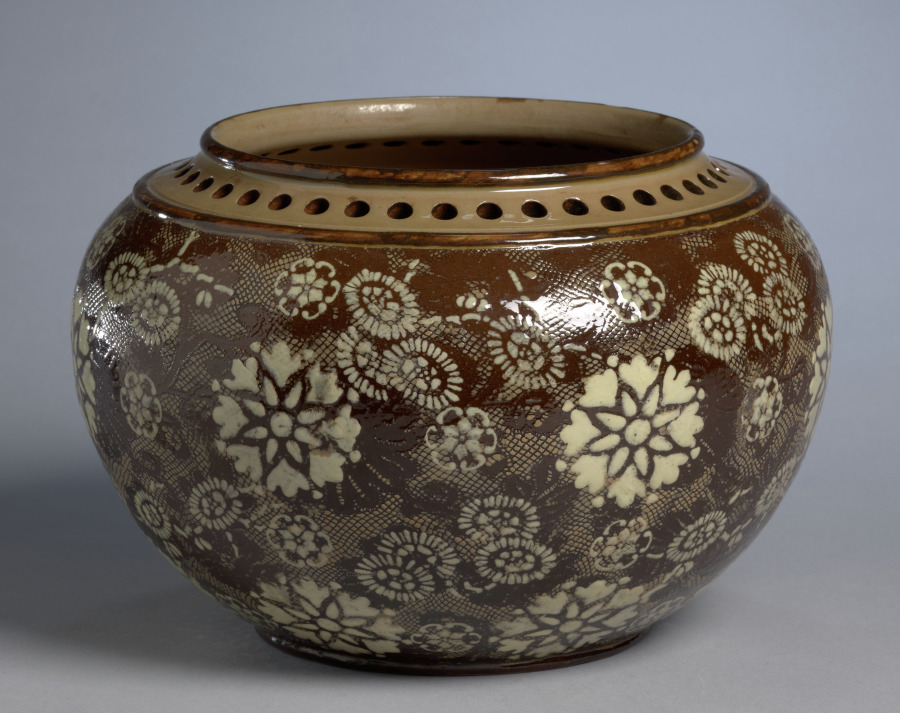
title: Bowl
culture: England, Lambeth, South London, 19th century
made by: Doulton Pottery and Porcelain Company (British)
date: c. 1885–1890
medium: stoneware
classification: Ceramic